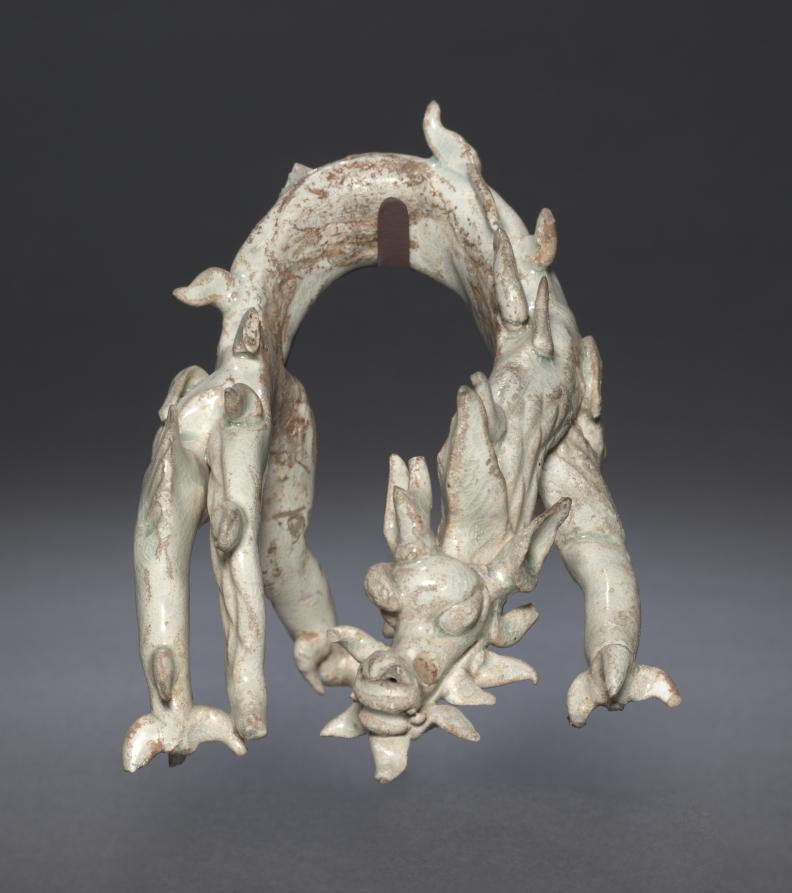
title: Dragon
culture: China, Southern Song Dynasty (1127-1279) - Yuan Dynasty (1271-1368)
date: 1127–1368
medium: glazed porcelain, qingbai ("blue-white") ware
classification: Ceramic